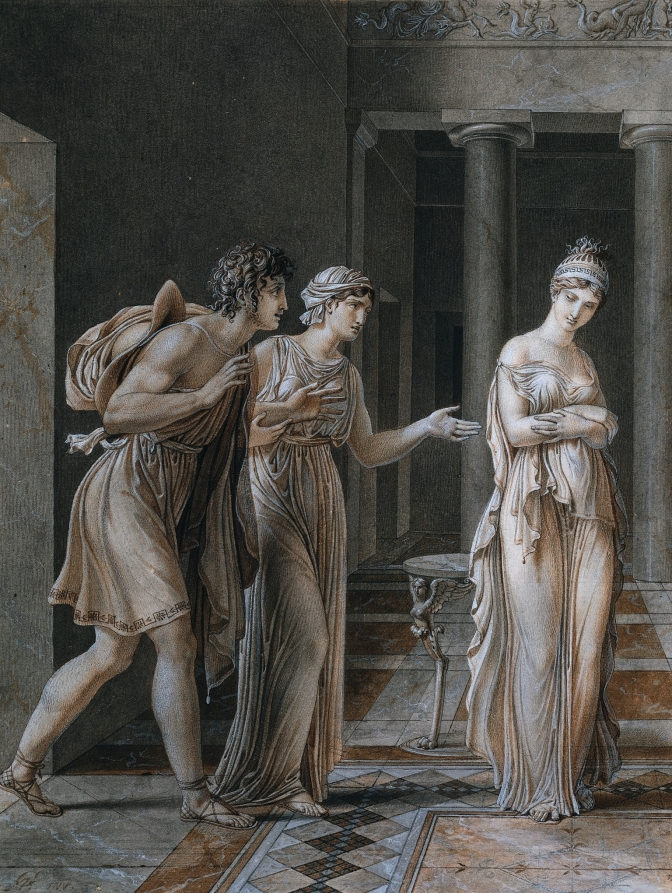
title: The Meeting of Orestes and Hermione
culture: France, early 19th Century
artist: Anne-Louis Girodet de Roucy-Trioson (French, 1767–1824)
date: c. 1800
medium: pen and brown and black ink, point of brush and brown and gray wash, with black chalk and graphite, heightened with white gouache, on cream wove paper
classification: Drawing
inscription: signed, lower left, in brown ink: ALG [artist’s monogram] / INV.; lower left, in black chalk: A L GIRODET INV.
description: When the French painter Jacques-Louis David was approached to work on a new edition of Jean Racine’s plays, he passed the task to his pupil Girodet, who excelled at illustrating literature. This highly refined drawing depicts a scene from Racine’s Andromaque, a complicated story of unrequited love and political treachery. Cléone introduces the love-blind Orestes to Hermione, who exploits his affection to make him do her bidding. Girodet skillfully contrasts Orestes’s eagerness and Hermione’s calculating character. With folded arms, she turns away, as if a statue between the columns of a cool marble interior. Yet Hermione’s sly, backward glance alerts the viewer of her cunning manipulation, which eventually drives Orestes mad.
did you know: The leg of the table behind Hermione has the form of a siren, a dangerous mythological creature that destroys anyone who hears its song.